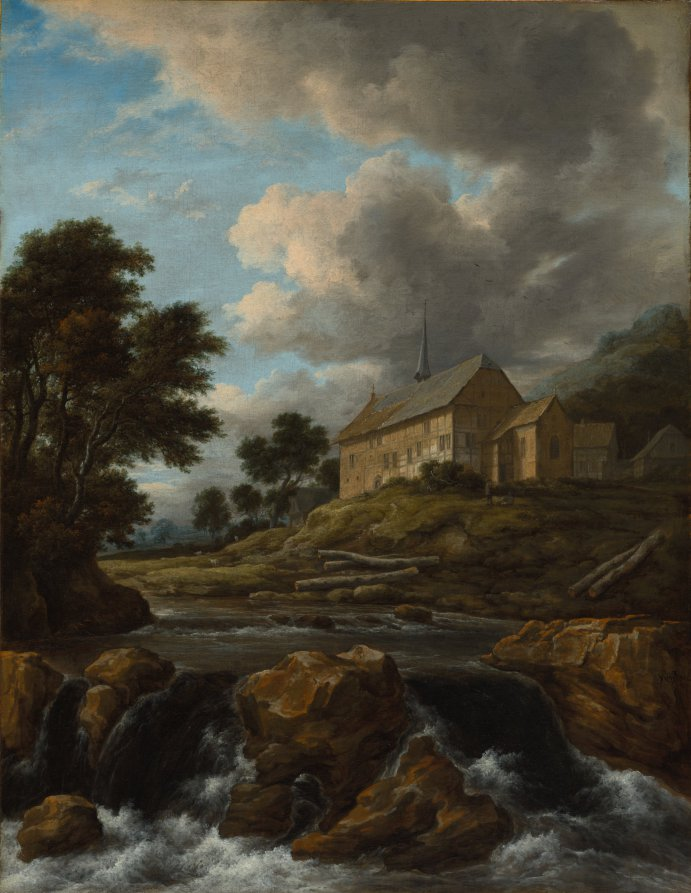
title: Landscape with a Church by a Torrent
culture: Netherlands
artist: Jacob van Ruisdael (Dutch, 1628/29–1682)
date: c. 1670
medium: oil on canvas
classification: Painting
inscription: Signed lower right: JvRuisdael [JvR in monogram]"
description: It is not known if Ruisdael considered his paintings to be social or moral commentary, for no documents from his lifetime indicate how the artist or his patrons interpreted the works. But in this painting dangerous rapids block access to the chapel, and severed logs litter the middleground, hinting at life’s transience and the challenge to reach salvation.